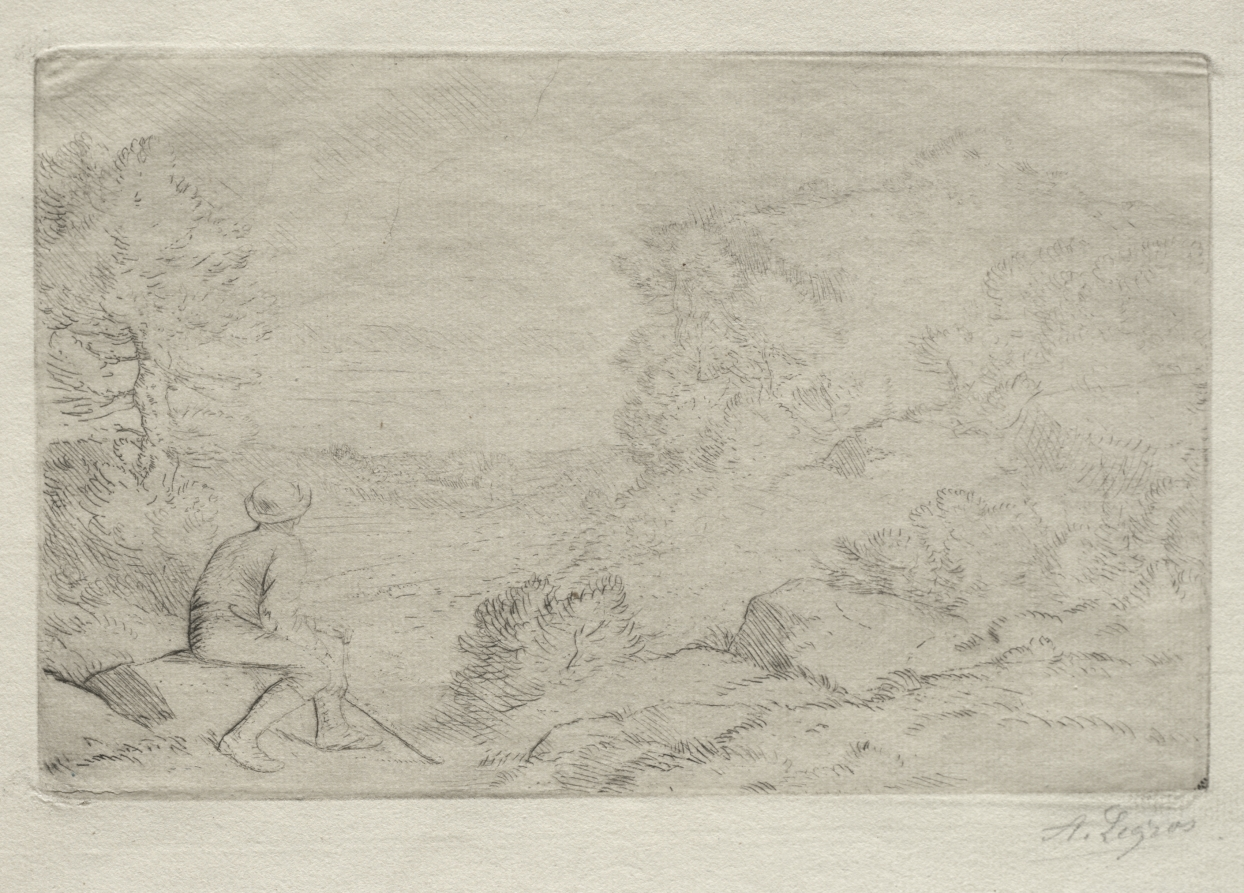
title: Rocks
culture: France, 19th-20th century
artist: Alphonse Legros (French, 1837–1911)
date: c. 1857–1911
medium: etching and drypoint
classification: Print